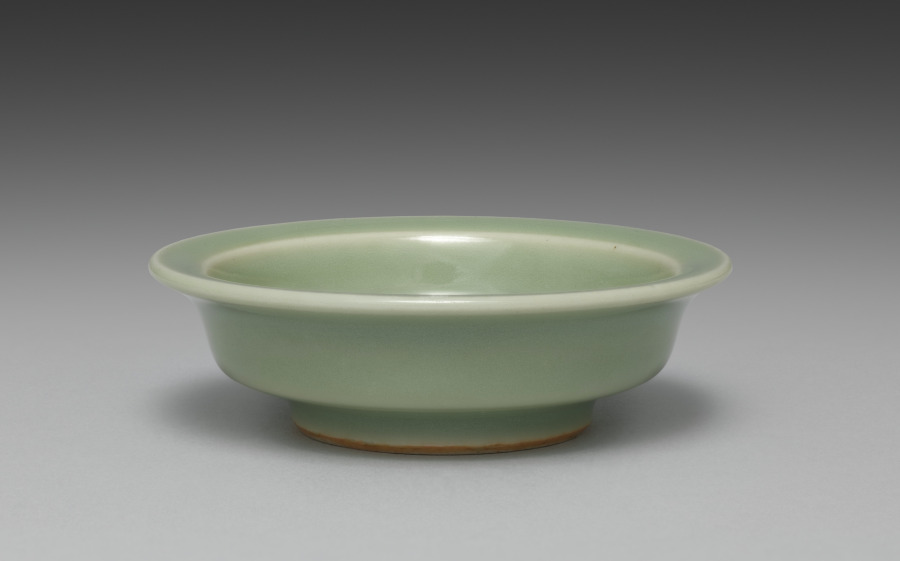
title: Saucer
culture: Japan, Meiji period (1868–1912)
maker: Seifū Yohei III (Japanese, 1851–1914)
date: 1893–1914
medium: One from a set of ten dishes; porcelain with green glaze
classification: Ceramic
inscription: 清風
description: Yohei III’s main output for his sophisticated clientele was in the form of tea sets and dining sets. He created a range of dishes in green glazes. He often produced in pairs, sets of five, or sets of ten. For this set of ten small dishes in a simple, round form that emphasizes the glaze above all, the box lid designates the piece as seiji, or green-glazed porcelain, using a general term for the extensive palette of green glazes often called celadon in English. The box lid further identifies the dishes themselves as tōchō, literally “bean-sized saucers,” a size that makes them suitable for dipping sauces.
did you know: The ten dishes in this set are stored in stacks of five in a two-compartment box.